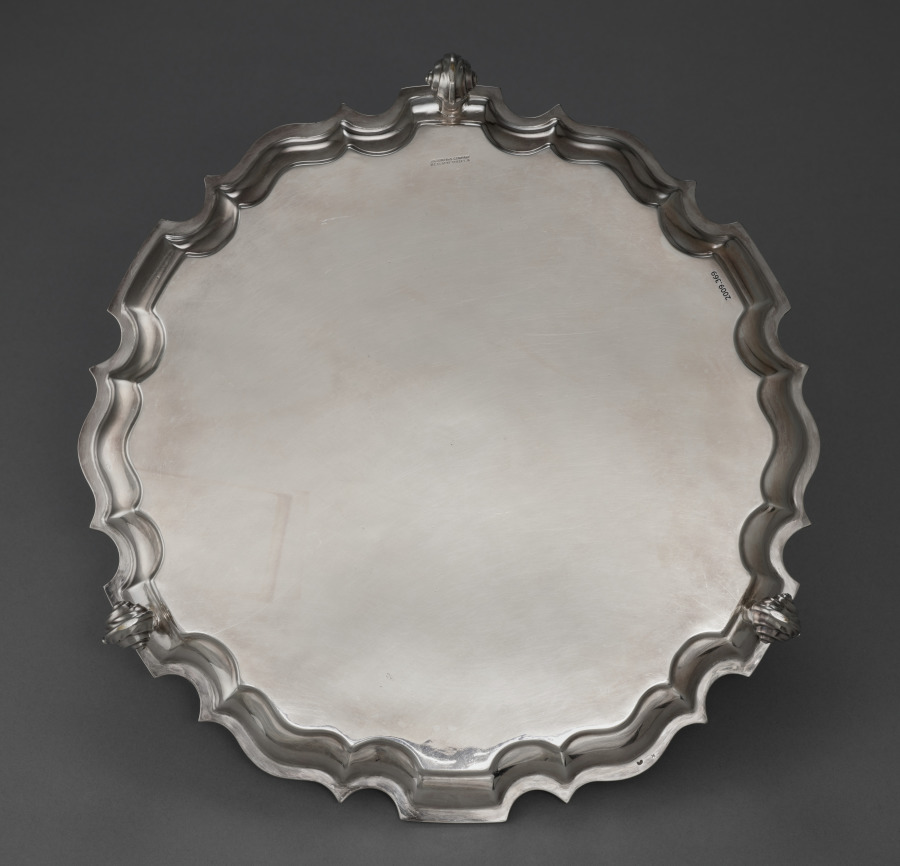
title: Salver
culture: England, London, 20th century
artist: Goldsmiths & Silversmiths Co. (British)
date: c. 1910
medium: silver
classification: Silver